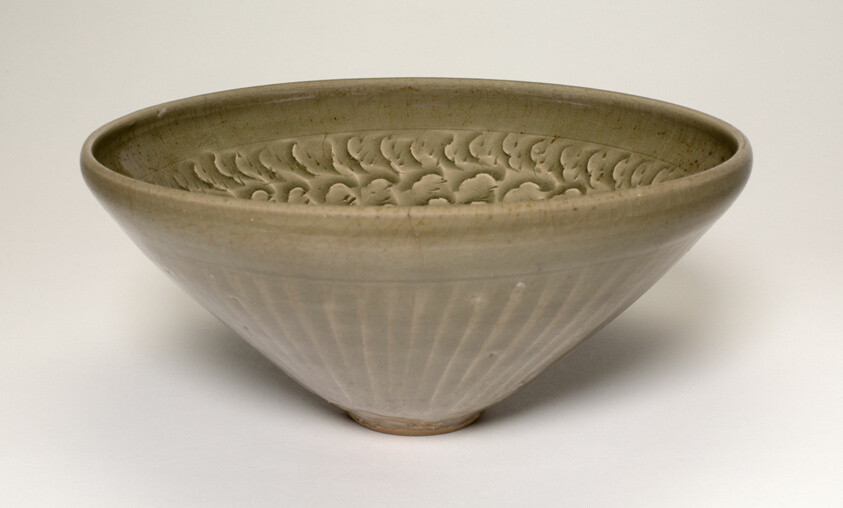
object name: Vessel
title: Deep Conical Bowl with Cloudlike Petals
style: Chinese (culture or style)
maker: China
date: Northern Song dynasty (960–1127), late 11th/early 12th century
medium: Yaozhou ware; celadon-glazed stoneware with underglaze carved decoration (exterior)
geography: China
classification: bowl; stoneware; dish (vessel); asian art; ceramics; vessel